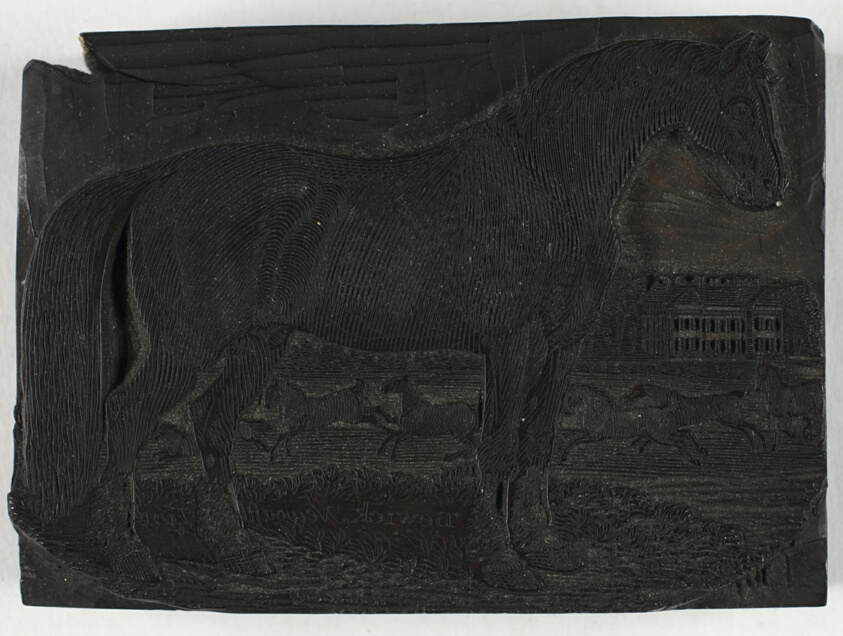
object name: Print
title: Woodblock for The Black Horse, from a General History of Quadrupeds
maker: Thomas Bewick (English, 1753-1828)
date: c. 1790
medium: Wood engraving block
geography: England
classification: wood engraving block; woodblock; matrix; prints and drawing; print